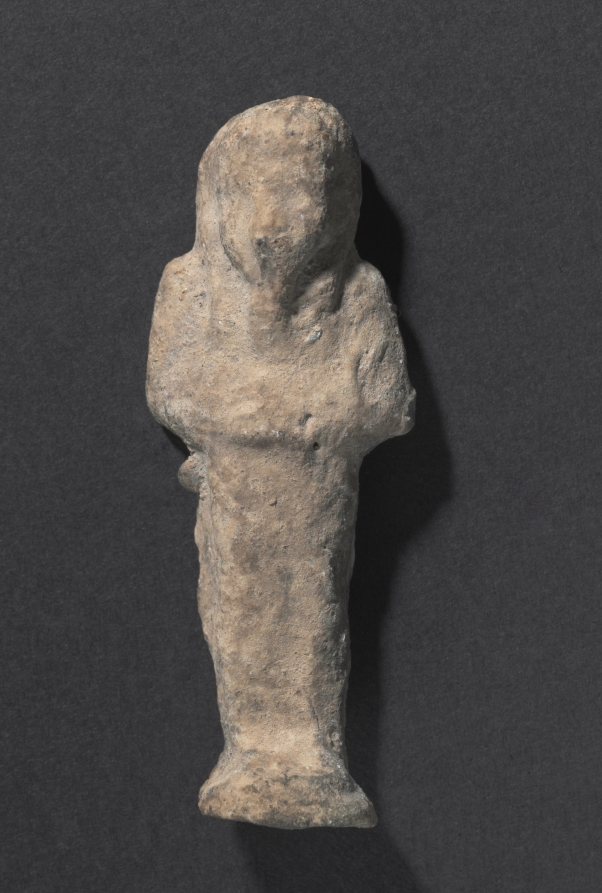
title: Shawabty of Ditamenpaankh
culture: Egypt, Late period (715–332 BCE), Dynasty 25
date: 715–656 BCE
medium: terracotta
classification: Funerary Equipment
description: High demand for shawabtys in the Late Period, a time when as many as 400 or more shawabtys were placed in the tomb with the deceased, gave rise to a specialized container for storing them: the shawabty box. This example is inscribed for the lady of the house, Ditamenpaankh, and was probably one of a pair originally made for her. The single-masted boat on the box's lid is perhaps an allusion to the pilgrimage of the deceased to the holy city of Abydos, the cult city of Osiris, king of the dead. The shawabtys inside are crude, mass-produced examples cast in an open mold. Made of terracotta, their blue paint imitates more costly shawabtys made of faience. As for the shawabty spell, it has been removed from its traditional location on the shawabty's front and relocated onto the sides of box, where it needed only to be written once, thus expediting production.